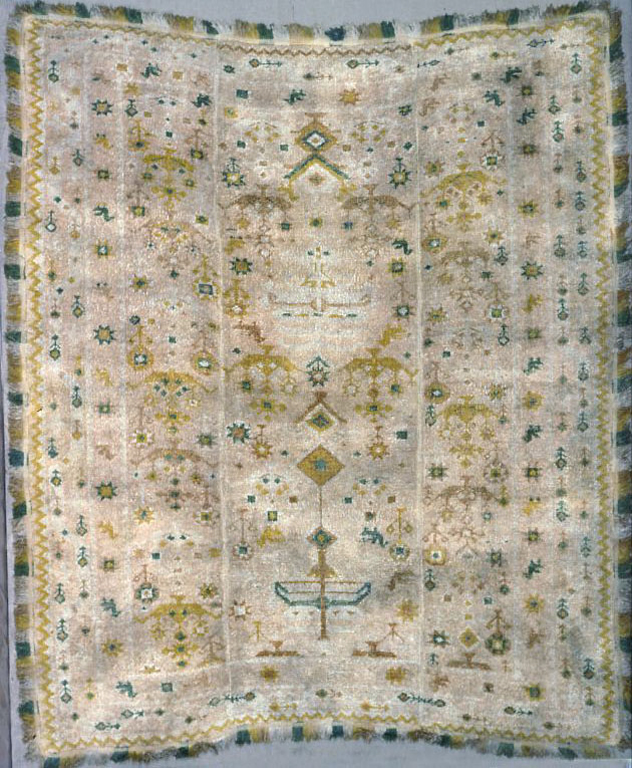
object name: Textile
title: Carpet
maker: Spain, possibly Alpujarra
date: 1785/1825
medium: Silk, plain weave with supplementary patterning and brocading wefts forming uncut pile; three panels joined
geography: Spain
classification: textile; weaving - carpet; weaving